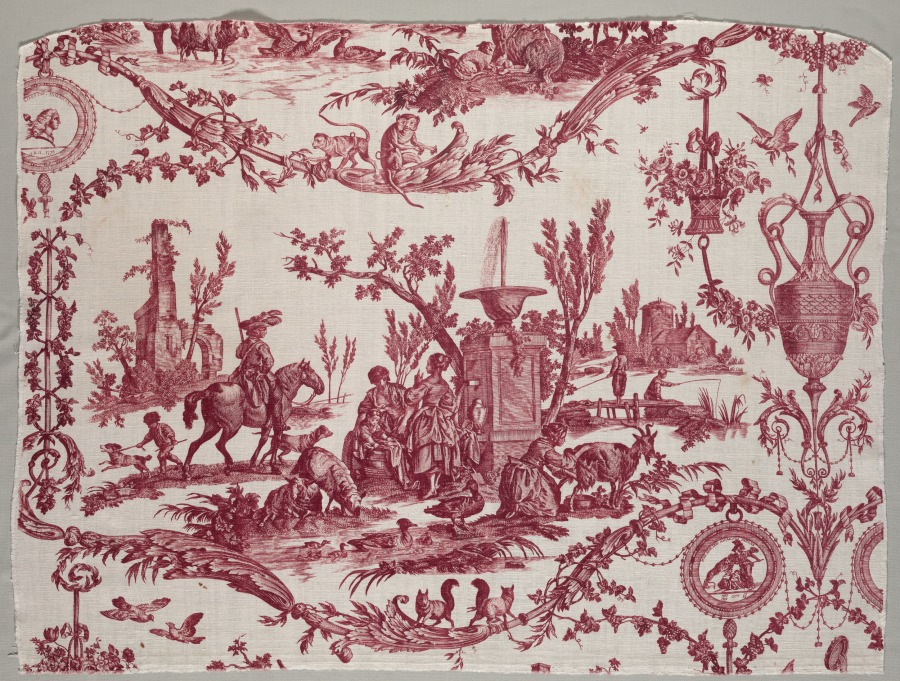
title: Fragments of Copperplate Printed Cotton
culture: France, 18th century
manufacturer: firm of Christophe Philippe Oberkampf (French, 1738–1815)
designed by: Jean-Baptiste Marie Hüet (French, 1745–1811)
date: c. 1789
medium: copperplate printed linen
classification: Textile